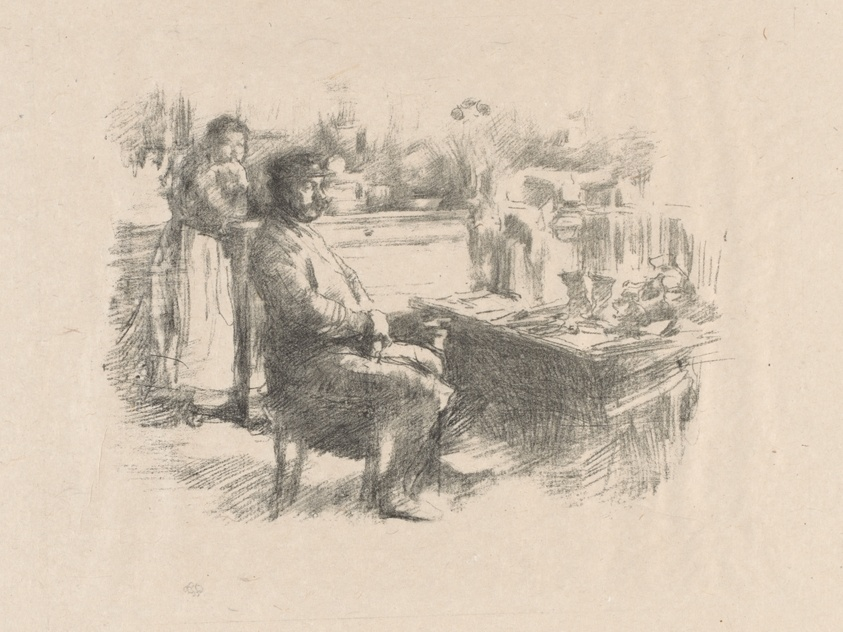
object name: Print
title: The Shoemaker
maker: James McNeill Whistler (American, 1834-1903)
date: 1896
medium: Transfer lithograph in black with stumping, on grayish ivory China paper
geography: United States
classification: transfer lithograph; lithograph; print; prints and drawing; paper